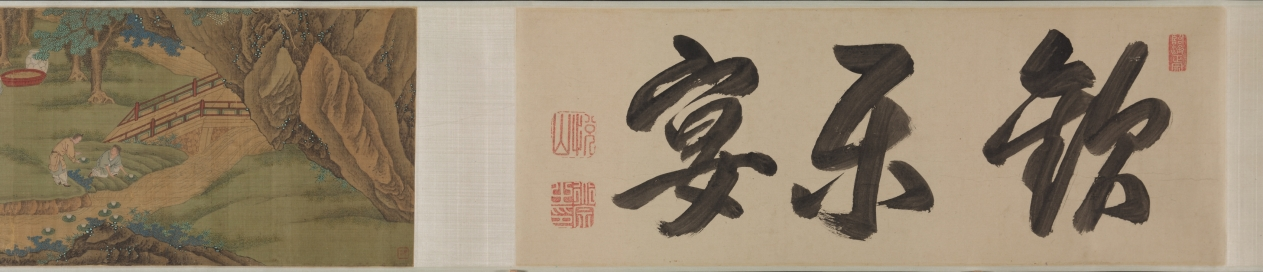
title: Purification at the Orchid Pavilion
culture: China, Qing dynasty (1644-1911)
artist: Fan Yi (Chinese, c. 1615–before 1688)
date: 1671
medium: Handscroll; ink and color on silk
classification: Painting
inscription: Artist's inscription, signature, and 2 seals: Painted by Fan Yi of Zhongfu during the second month of winter of the xinhai year [1671]. [2 seals] Fan Yi zhi yin, Zi yu yi.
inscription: Title on the frontispiece by Monk Yueshan (1629-1709).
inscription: 3 colophons and 13 additional seals: 1 colophon, dated 1707, and 6 seals of Yueshan; 2 colophons and 3 seals of Wong Kwan-Shut (Huang Junshi) 黃君實 (b. 1934); 2 seals of Fu Shen 傅 申 (b. 1937); 2 seals of Tessai Tomioka 富岡鐵齋 (1836-1924).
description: By the 1600s, the historic gathering at Lanting, Zhejiang province, in 353 CE was a common theme in Chinese painting. Originally based on a composition attributed to Li Gonglin (1049– 1106), now lost, Wu school artists revived the theme. Fan Yi, the brother of the artist Fan Qi from Nanjing, used delicate brushwork and luminous colors to depict the spring gathering.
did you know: The gathering’s host is in the Orchid Pavilion at the end of the scroll, representing an episode known as “Wang Xizhi Watching the Geese 王羲之觀鵝圖.”